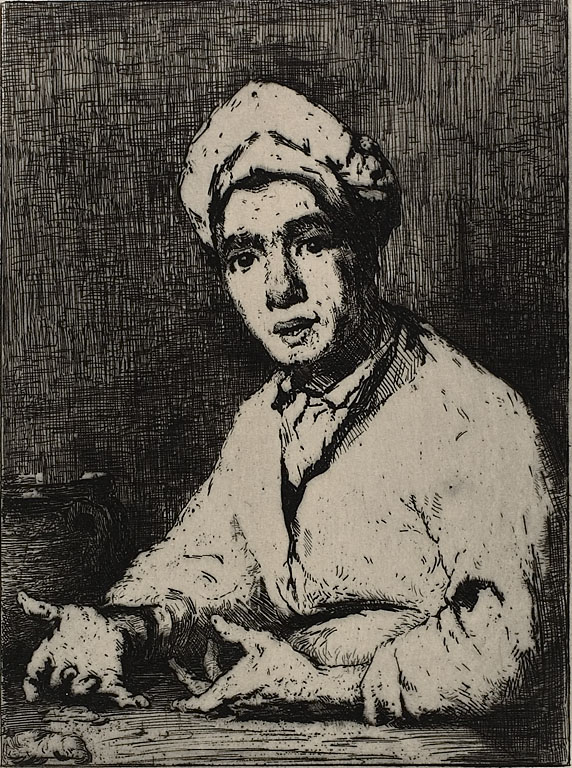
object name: Print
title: The Cook's Recipe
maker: Théodule Augustin Ribot; French, 1823-1891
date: 1878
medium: Etching on cream laid Japanese paper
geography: France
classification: etching; print; prints and drawing